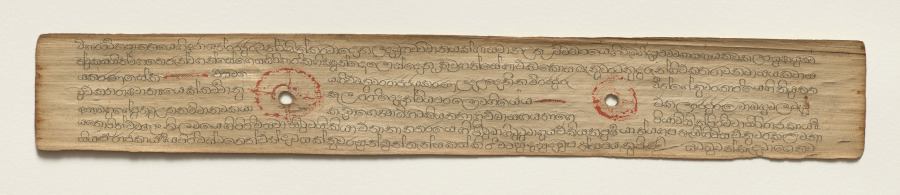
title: Leaf from a Buddhist Manuscript (verso)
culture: Sri Lanka, Singhalese, Late 17th century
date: c. 1700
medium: fiber paper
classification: Manuscript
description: Palm leaf material is still used for manuscripts in Sri Lanka. The palm leaves are prepared first by boiling them, drying them in the sun, and then rubbing them with oils. Scribes then use a metal stylus to incise the text. Then charcoal powder is wiped across the pages, filling in only the inscribed lines.